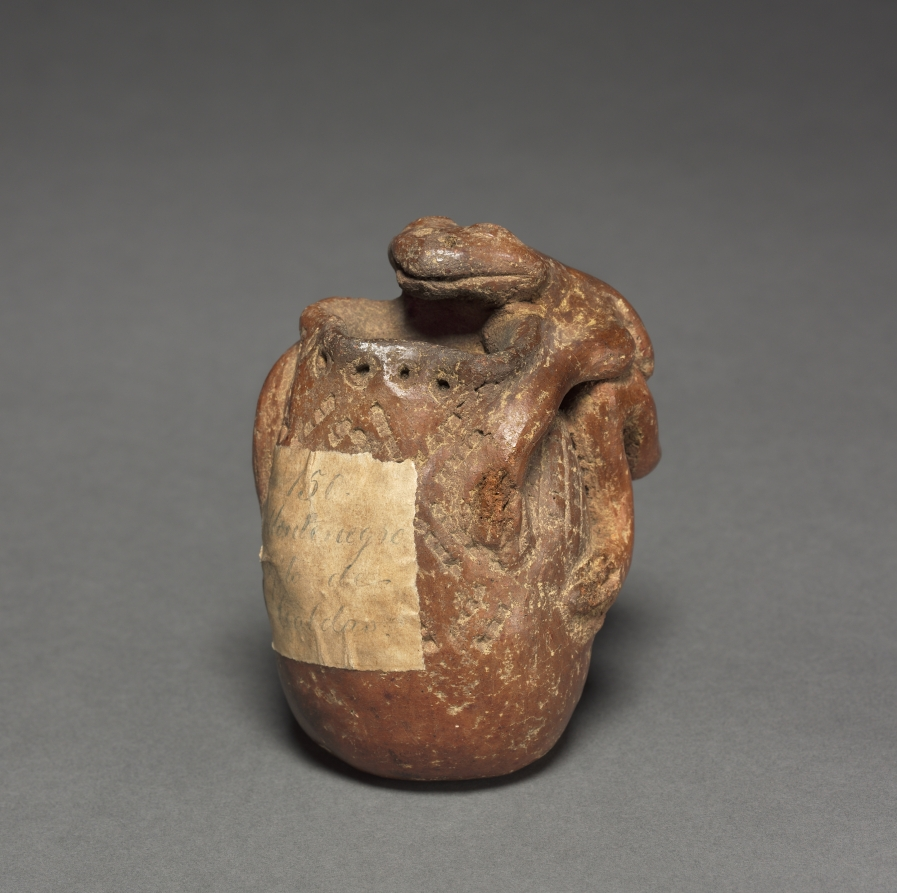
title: Jar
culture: Colombia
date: before 1921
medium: red ware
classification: Ceramic